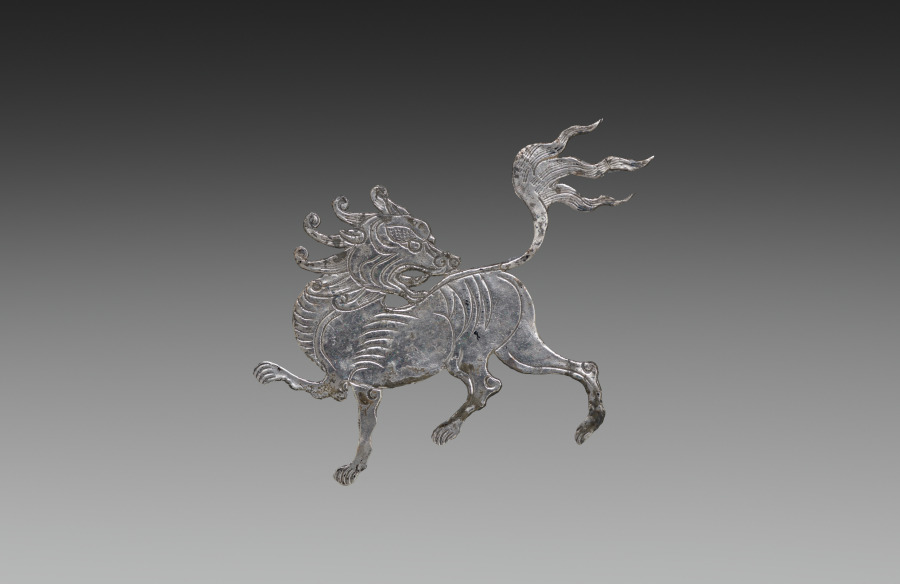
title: Inlay for a Mirror or Box: shih-shih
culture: China, Tang dynasty (618-907) - Song dynasty (960-1279)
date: c. 900–1000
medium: beaten silver with chased details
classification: Metalwork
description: The p'ing-t'o technique of inlaying gold and silver foil on lacquer produced luxurious articles of elegance and fragility. These stray silver inlays were originally mounted on a mirror back or a cosmetic box whose lacquered surface has disintegrated. They combine auspicious symbols of Indian and Chinese origin--human-headed birds whose melodies filled the Buddhist paradise, and bird-riding deities who inhabited the skies of Taoist mythology. Like these imaginary beings, the lions were probably paired in a radial design; at least one has been lost.